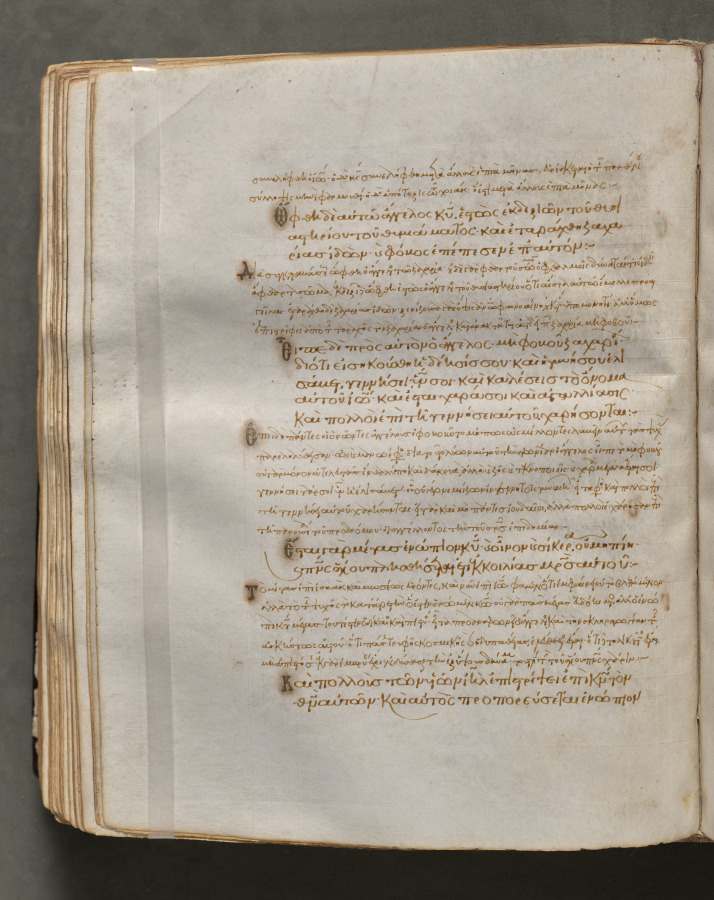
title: Text, folio 201 (verso), from a Gospel Book with Commentaries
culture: Byzantium, Constantinople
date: c. 1000–1100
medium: ink, tempera, and gold on vellum; leather binding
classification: Bound Volume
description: Each of the four gospels in this book opens on a page with brilliantly illuminated borders depicting the author of the text as well as birds-principally peacocks, symbols of the immortality of the soul-and fountains, representing the fountain of life and the salvation of the soul. This volume consists of 428 leaves with texts in Greek. Its level of sophistication suggests that it was probably written and decorated in a monastery in Constantinople.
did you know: Gospel Books were carried in procession through Byzantine churches.